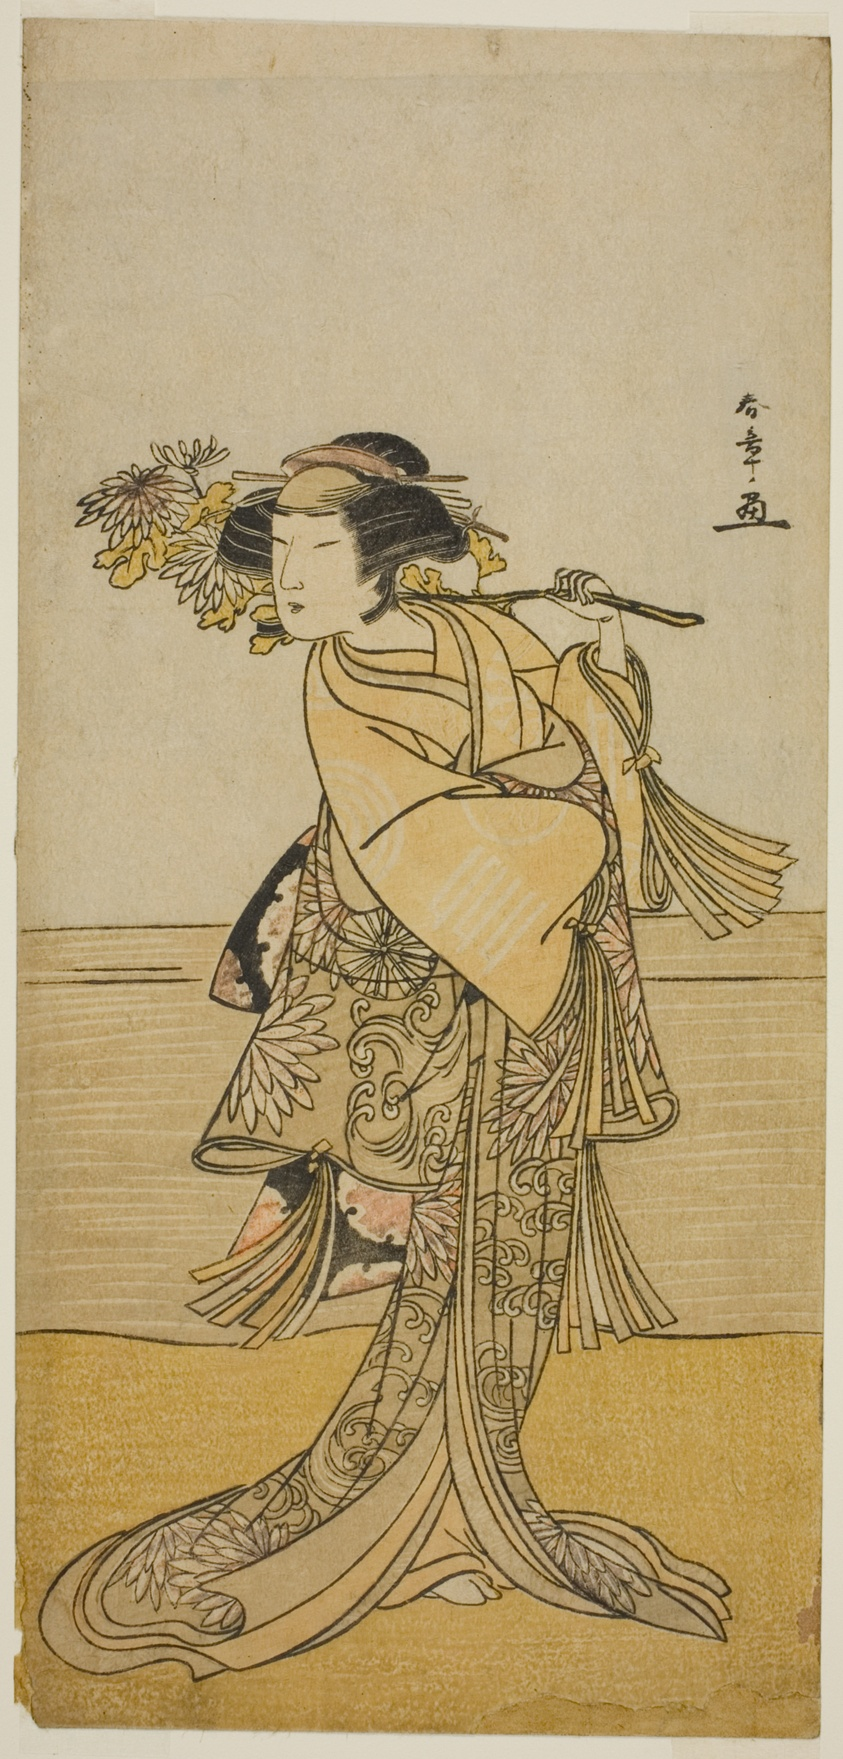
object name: Print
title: The Actor Nakamura Tomijuro I as a Female Fox from Mt. Ubagadake in the Play Chigo Torii Tobiiri Kitsune, Performed at the Ichimura Theater in the Eleventh Month, 1777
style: Japanese (culture or style)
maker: Katsukawa Shunsho 勝川 春章; Japanese, 1726-1792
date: c. 1777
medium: Color woodblock print; hosoban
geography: Japan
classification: woodblock print; print; asian art